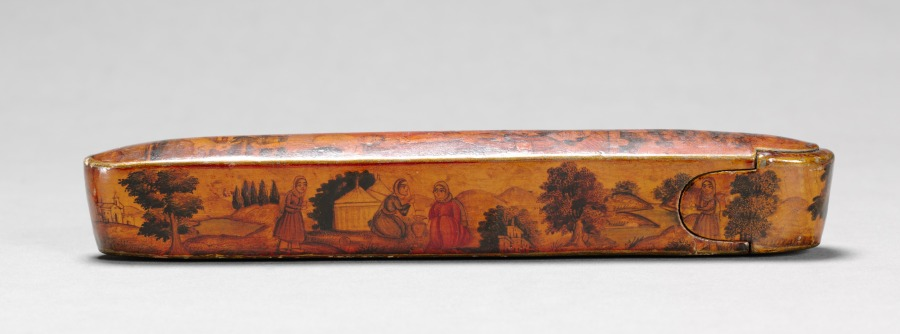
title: Pen and Ink Box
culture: Iran, Qajar period (1779-1925)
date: 1800s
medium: lacquer over papier maché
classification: Lacquer